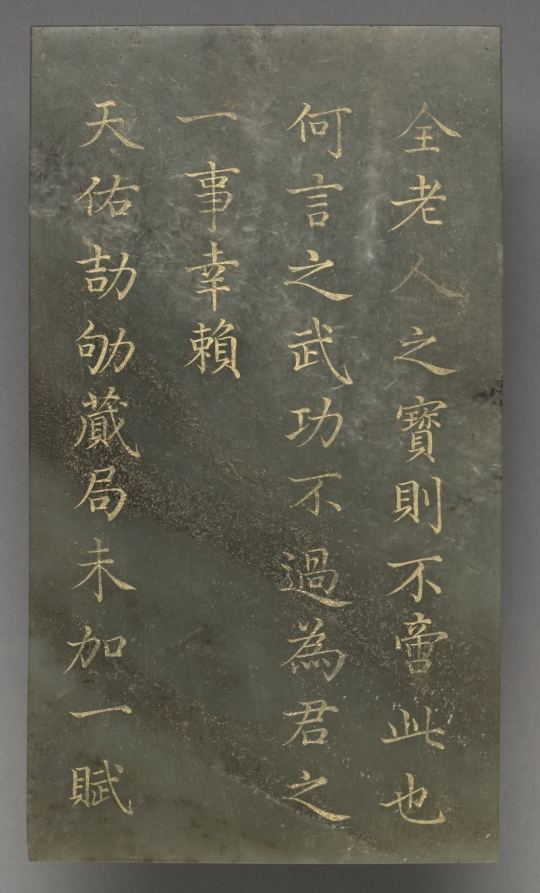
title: Tablet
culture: China, Qing dynasty (1644–1911), Qianlong reign (1736–95)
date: 1778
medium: jade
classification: Jade